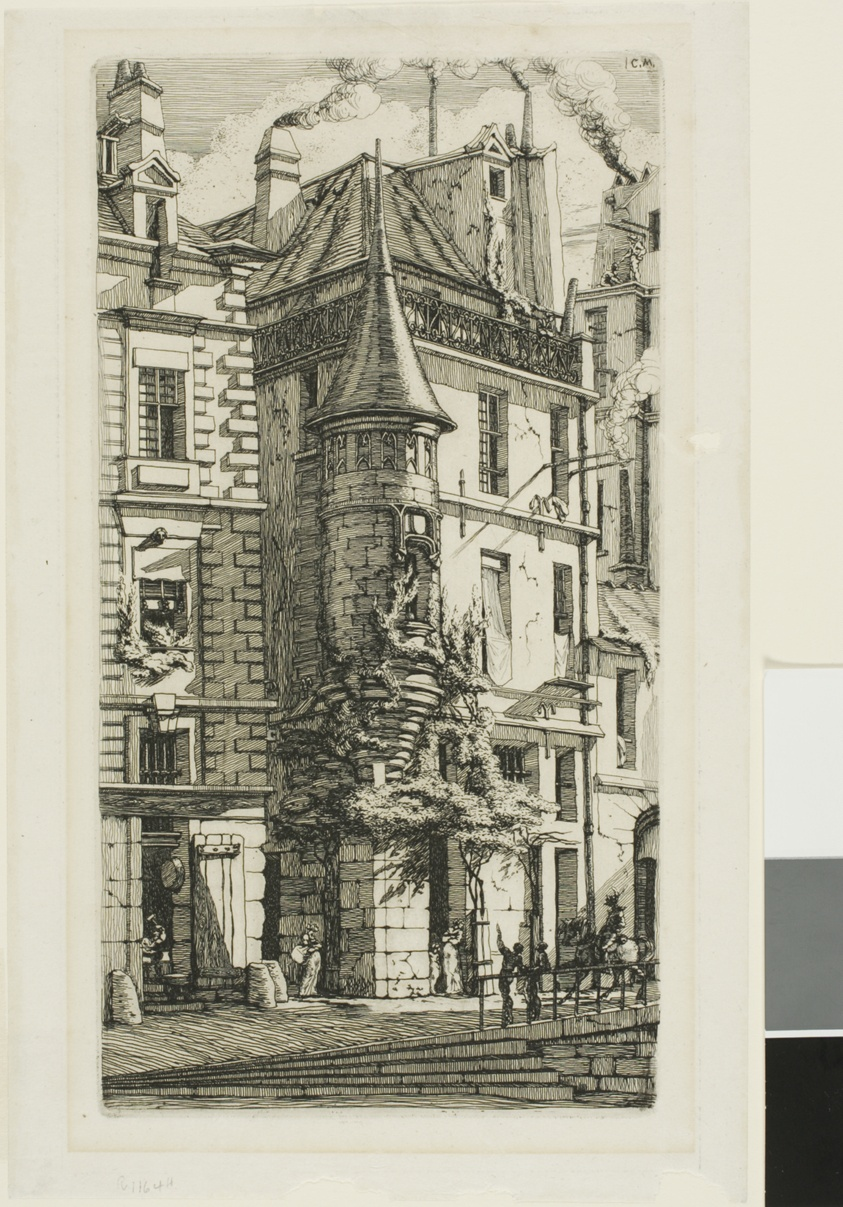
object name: Print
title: Tourelle de la rue de la Tixeranderie.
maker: Charles Meryon (French, 1821-1868)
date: 1852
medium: Etching on paper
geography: France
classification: print; prints and drawing